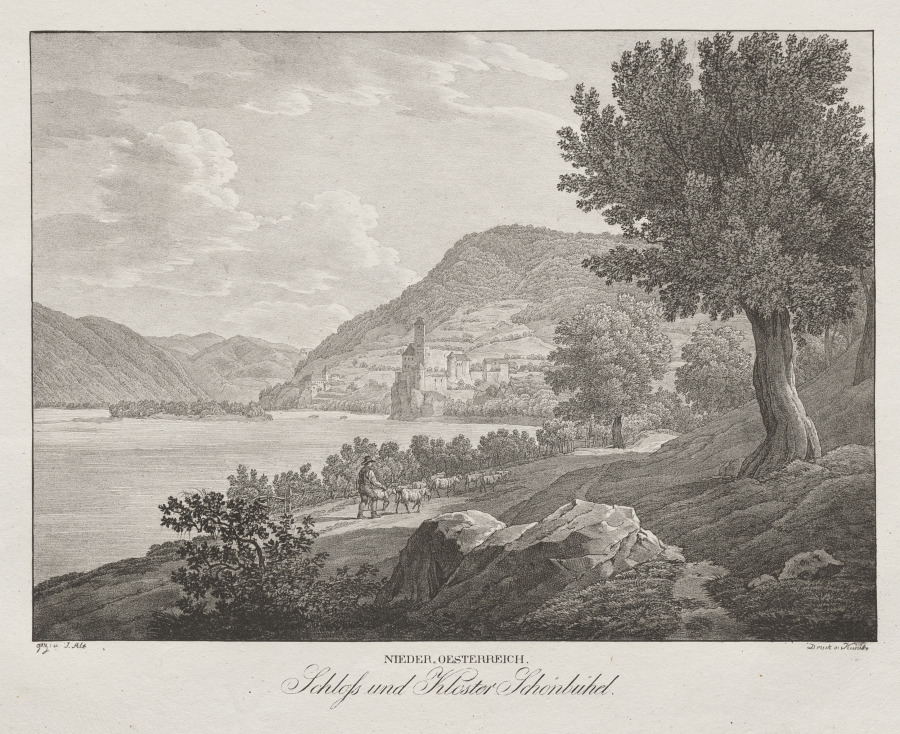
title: Nieder-oesterreich, Schloss und Kloster Schönbühel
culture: Austria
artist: Jakob Alt (Austrian, 1789–1872)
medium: lithograph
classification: Print